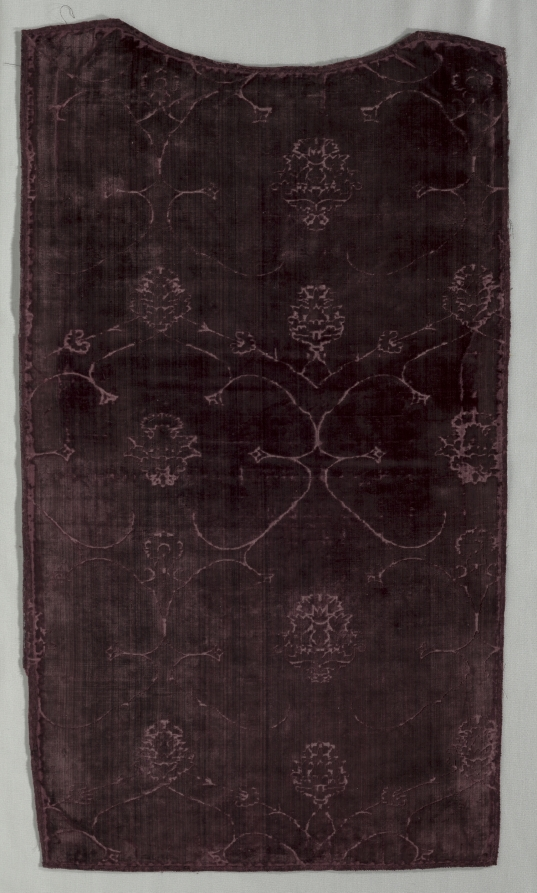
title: Velvet with Pomegranate Pattern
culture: Italy, 15th century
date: 1400s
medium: velvet weave (cut and voided): silk thread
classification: Velvet